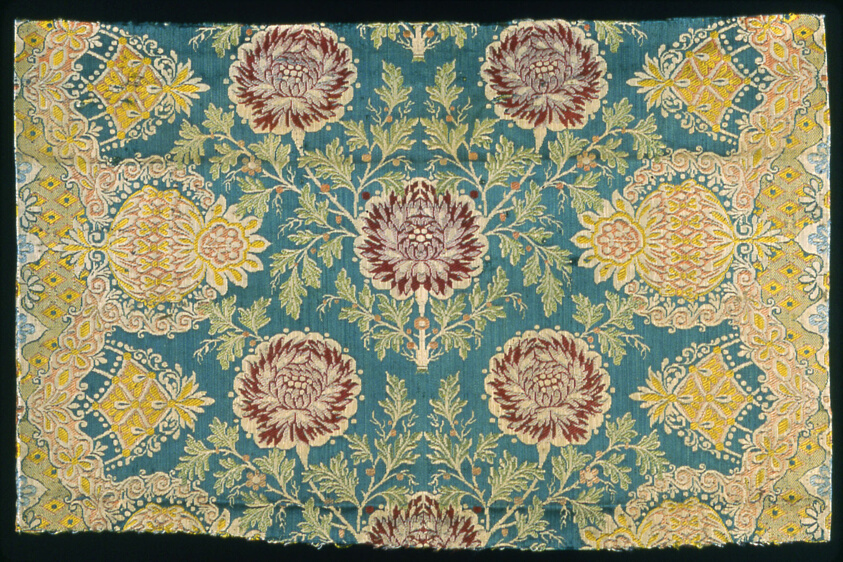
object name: Textile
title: Fragment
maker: France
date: 1701/50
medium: Silk, warp-float faced satin weave with supplementary brocading wefts and self patterning ground wefts tied by supplementary binding warps in plain interlacing (lampas)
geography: France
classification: textile; weaving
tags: lace